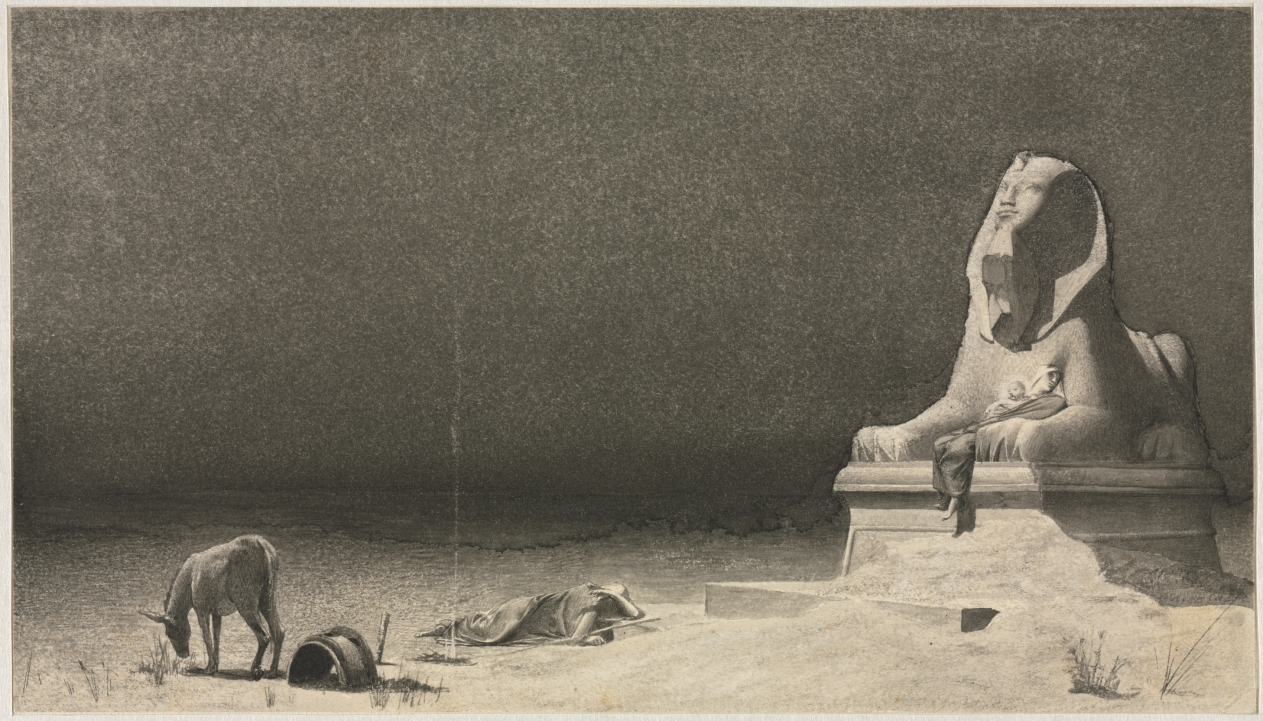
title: The Rest on the Flight into Egypt (recto)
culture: France, 19th century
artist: Luc-Olivier Merson (French, 1846–1920)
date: c. 1879–80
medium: gray and graphite wash, with scraping and traces of black chalk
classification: Drawing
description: This drawing relates to Luc-Olivier Merson's Rest on the Flight into Egypt, among the most popular paintings exhibited at the 1879 Paris Salon. This dream-like, highly unusual image from the familiar bible story shows Mary and Christ resting peacefully in the arms of a Sphinx, while Joseph sleeps near their dwindling fire. In the wake of its extraordinary success, Merson made several painted replicas of the work. Here, the composition is identical, but reversed, suggesting that it may have been an alternative version of the canvas.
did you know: It is possible that this drawing served as a model for a print, but the best-known printed reproduction of the painting differs from the sheet in several minor details.